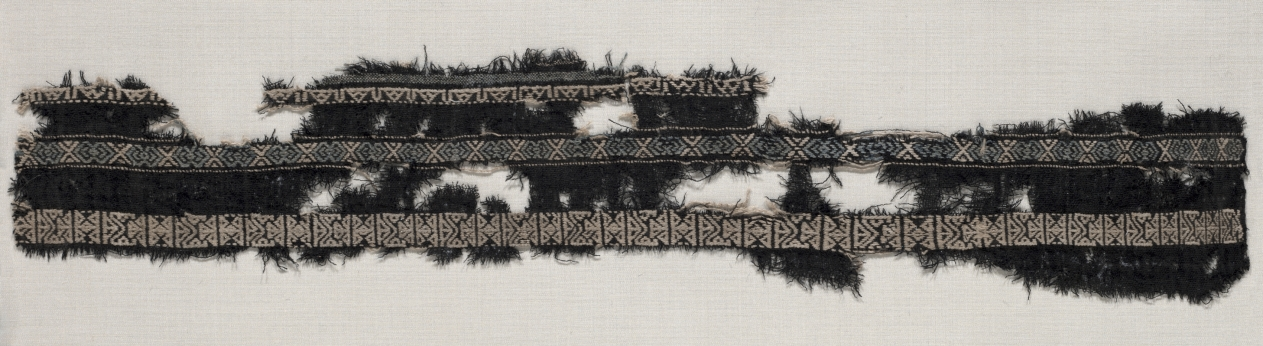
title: Fragment of Border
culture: Egypt, 9th century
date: 800s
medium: wool: plain weave wtih supplementary weft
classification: Textile